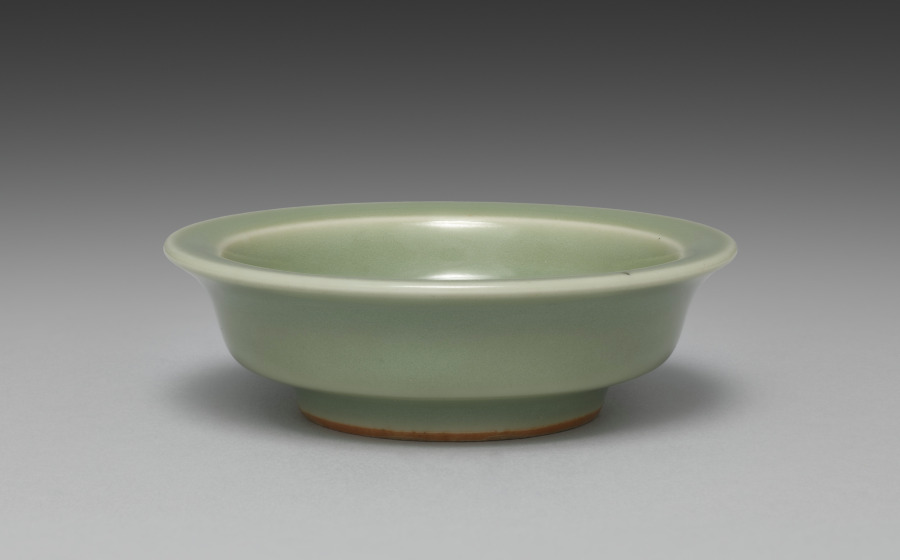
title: Saucer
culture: Japan, Meiji period (1868–1912)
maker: Seifū Yohei III (Japanese, 1851–1914)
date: 1893–1914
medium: One from a set of ten dishes; porcelain with green glaze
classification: Ceramic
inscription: 清風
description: Yohei III’s main output for his sophisticated clientele was in the form of tea sets and dining sets. He created a range of dishes in green glazes. He often produced in pairs, sets of five, or sets of ten. For this set of ten small dishes in a simple, round form that emphasizes the glaze above all, the box lid designates the piece as seiji, or green-glazed porcelain, using a general term for the extensive palette of green glazes often called celadon in English. The box lid further identifies the dishes themselves as tōchō, literally “bean-sized saucers,” a size that makes them suitable for dipping sauces.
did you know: The ten dishes in this set are stored in stacks of five in a two-compartment box.